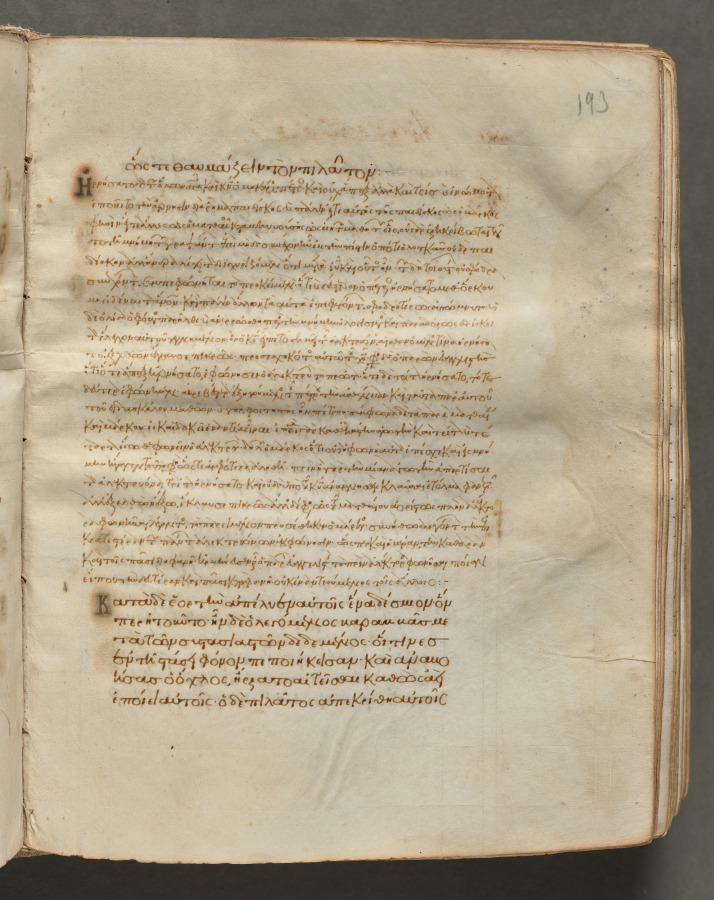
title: Text, folio 193 (recto), from a Gospel Book with Commentaries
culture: Byzantium, Constantinople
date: c. 1000–1100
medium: ink, tempera, and gold on vellum; leather binding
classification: Bound Volume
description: Each of the four gospels in this book opens on a page with brilliantly illuminated borders depicting the author of the text as well as birds-principally peacocks, symbols of the immortality of the soul-and fountains, representing the fountain of life and the salvation of the soul. This volume consists of 428 leaves with texts in Greek. Its level of sophistication suggests that it was probably written and decorated in a monastery in Constantinople.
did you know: Gospel Books were carried in procession through Byzantine churches.